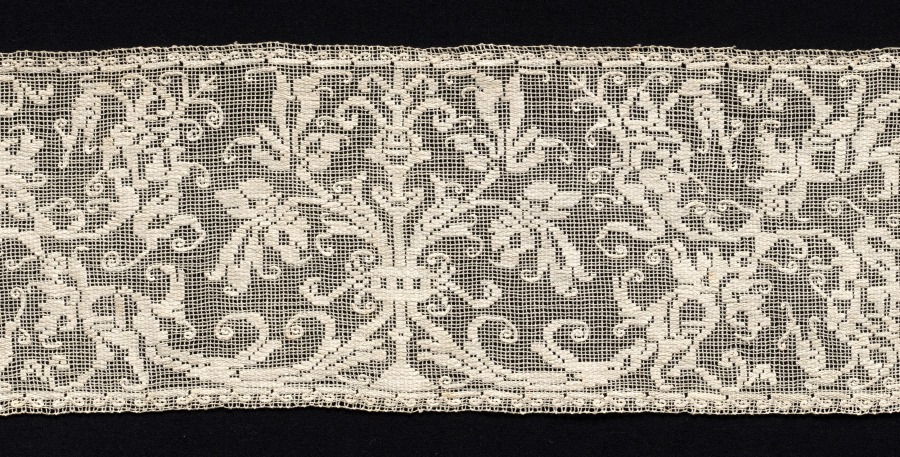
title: Band with Scroll Pattern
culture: Italy, Sicily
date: 1500s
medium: Bleached linen (est.): needle lace, burato (twined ground and darned in one direction)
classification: Lace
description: A scrolling vine with budding vegetation or a tendril is a recurring pattern in needle lace. The frequent use of the motif, adapted in lace from different centuries and regions, suggests that it was found in a pattern book. Here, the pattern is excessively ornate with additional swirling motifs and flourishing vases.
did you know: Books of patterns for lace making and other needlework were aimed at well-to-do women and girls to encourage domestic virtue.